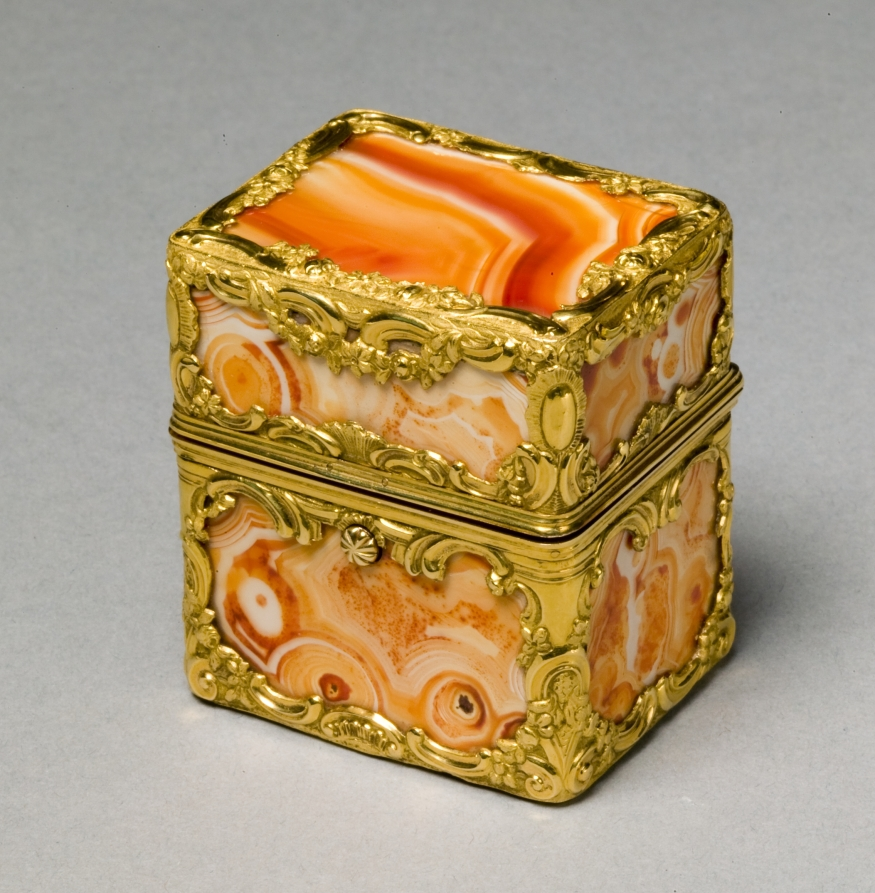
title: Vanity Set (Nécessaire)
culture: England, mid 18th century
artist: manner of James Barbot (British)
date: c. 1760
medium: gold, agate, interior fitted with implements, mirror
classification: Miscellaneous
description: Luxurious personal objects were an essential part of a privileged wardrobe during the 1700s and early 1800s, emphasizing their owner’s refinement and wealth. Jewelry, miniatures, and nécessaires—small expensive sets designed to hold grooming, writing, and sewing tools—were often given as intimate gifts, intended to be seen and admired. Their glittering surfaces, however, disguised a system based on the labor and suffering of enslaved or indentured people, whether in gold and stone mines or shops where these goods were made.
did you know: This small box with a mirror-lined lid is a dressing table accessory for travel that contains luxury objects such a clasp knife, tweezers, manicure set, and scent bottles.